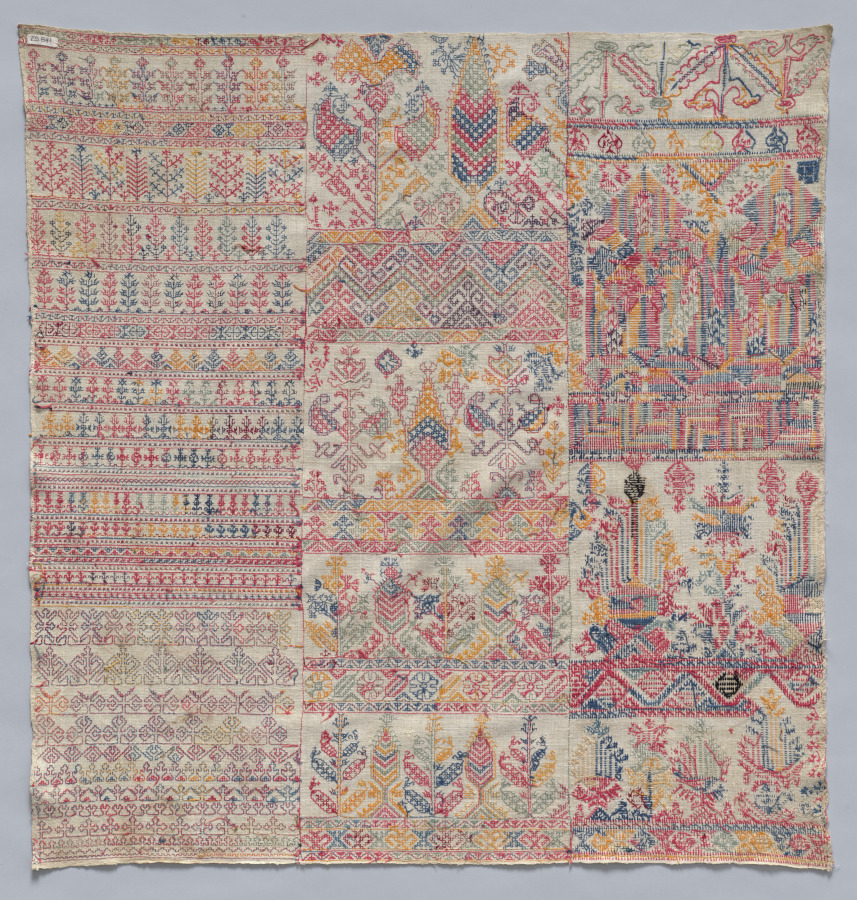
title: Embroidery Sampler (Chelliga/Shelliga)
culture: Africa, North Africa, Morocco, Salé, Moroccan embroiderer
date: 1800s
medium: Cotton, silk, dye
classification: Sampler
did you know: Upon completing their training, professionally trained young women would produce a sampler as a “diploma” testifying to their embroidery skills.